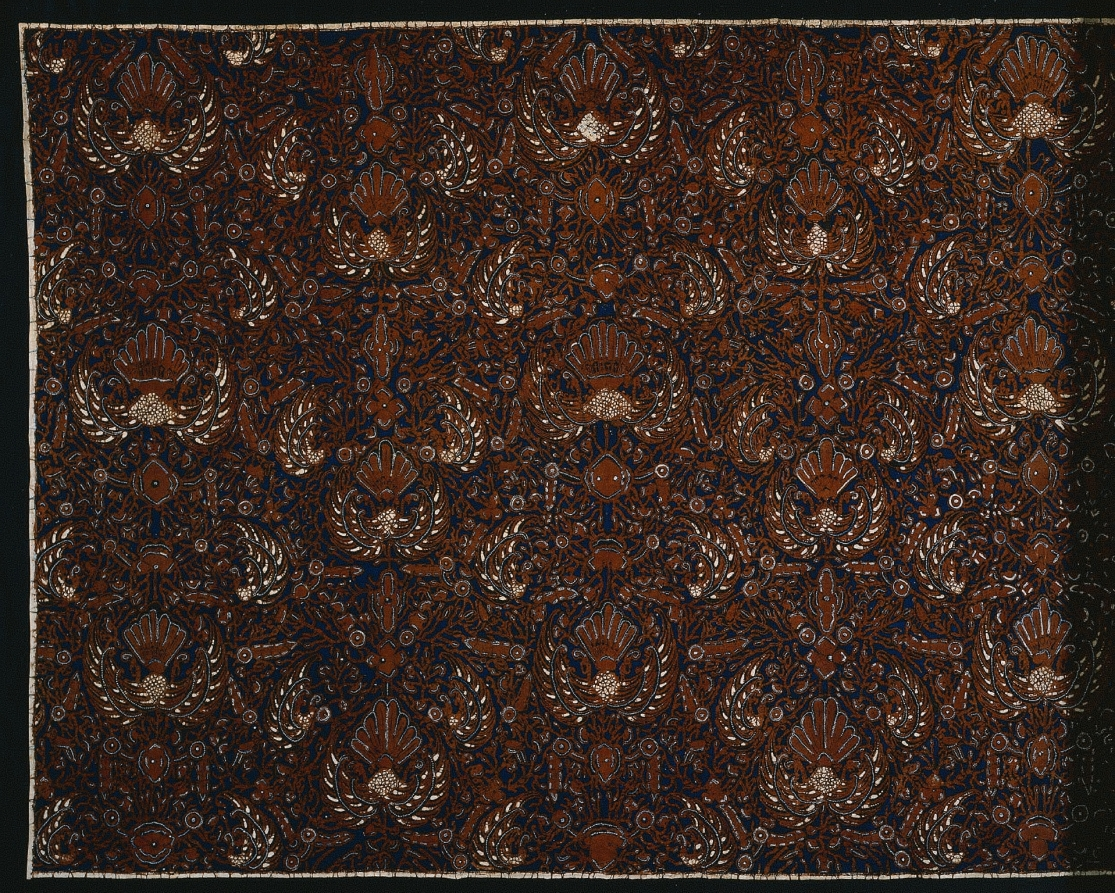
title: Kain Panjan (Skirt)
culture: Indonesia, Central Java, 19th century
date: 1800s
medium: batik; cotton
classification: Textile